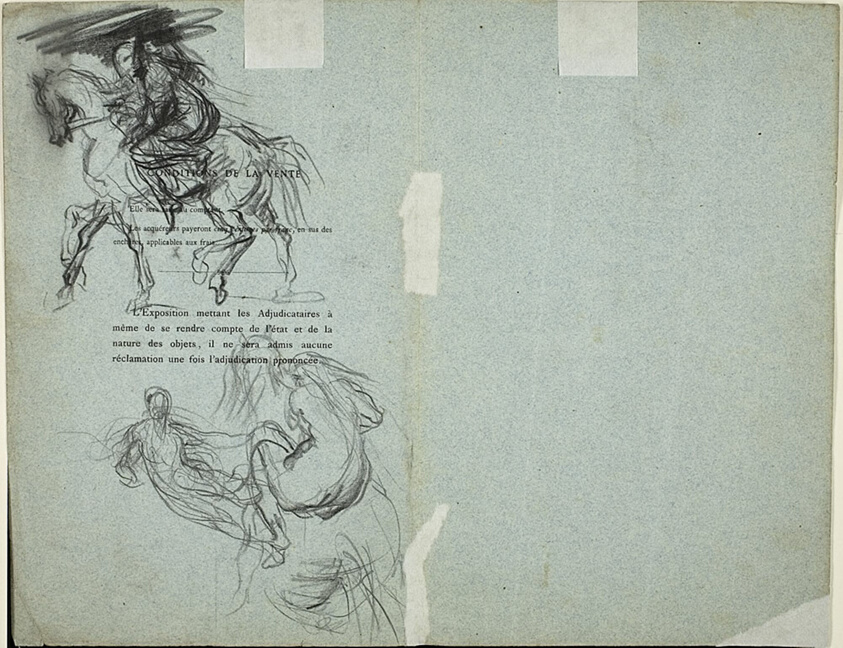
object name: Drawing and Watercolor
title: Sketch of Nude Woman Having Her Hair Groomed and Groups of Figures (recto); Sketches of Riding Figure and Nude Figures (verso)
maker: Jean Baptiste Carpeaux (French, 1827-1875)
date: 1847/75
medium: Black crayon (recto and verso) on blue wove paper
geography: France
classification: crayon; drawings (visual works); prints and drawing